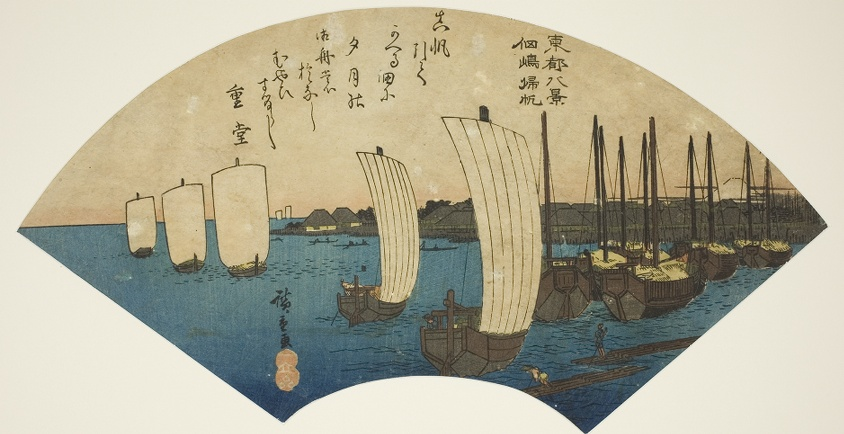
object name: Print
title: Returning Sails at Tsukudajima (Tsukudajima kihan), from the series "Eight Views of the Eastern Capital (Toto hakkei)"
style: Japanese (culture or style)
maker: Utagawa Hiroshige 歌川 広重; Japanese, 1797-1858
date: 1836/37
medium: Color woodblock print; ogi-e on aiban sheet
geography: Japan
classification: woodblock print; print; asian art